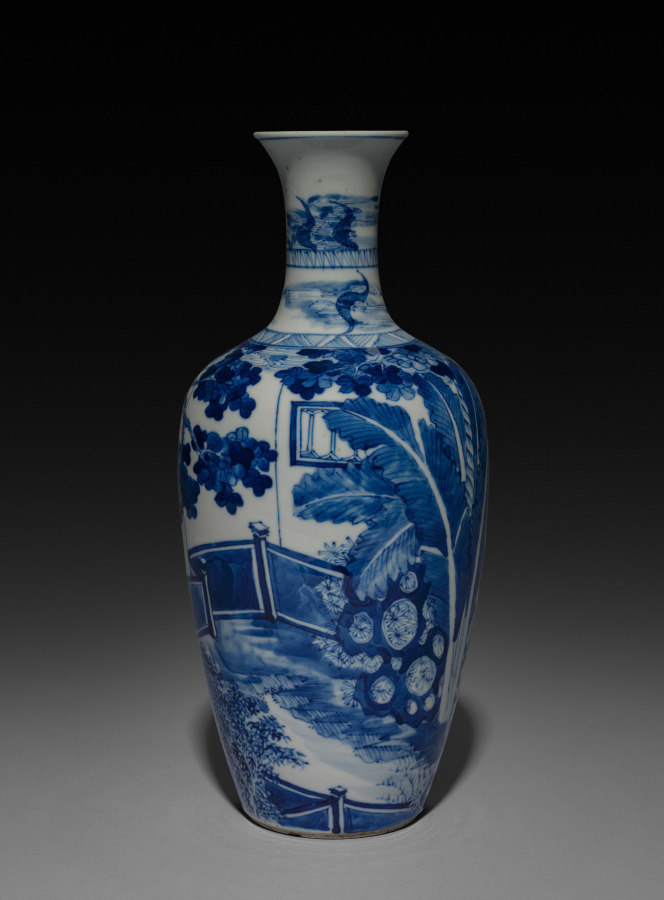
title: Vase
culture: China, Qing dynasty (1644-1911), Kangxi reign (1661-1722)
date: 1662–1722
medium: porcelain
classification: Ceramic